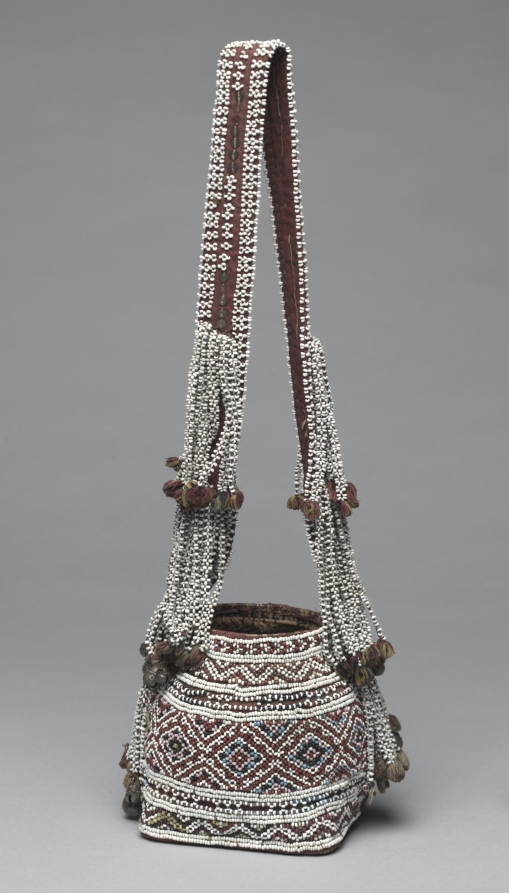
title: Shoulder basket (Bagobo people)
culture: Philippines, Davao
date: c. 1875–1917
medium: natural fibers, cloth, glass beads, metal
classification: Textile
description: This shoulder bag is built on a rigid, flat-bottomed rattan basket. A rough, red-dyed cotton cloth has been shaped to the basket and secured with abacá fiber stitching. The strap features small metal sequins sewn along the strap and at the hem. Additional beaded strands hang from the strap junction and rim, each terminating in small fiber-wrapped tassels.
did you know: The elaborate applied glass beadwork decorating the surface is characteristic of the Bagobo people.